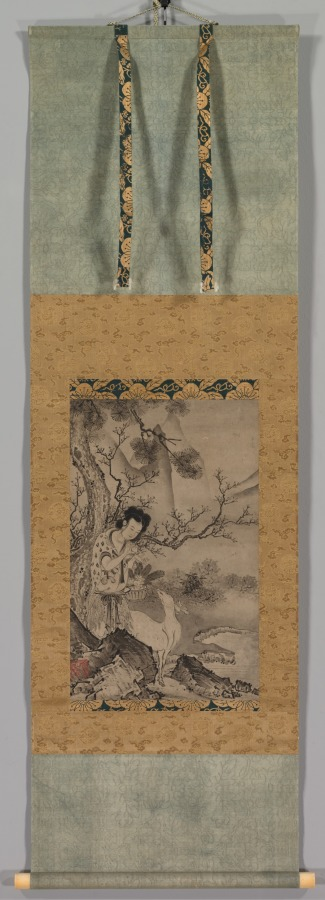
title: Female Daoist Figure in Landscape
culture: Japan, Muromachi period (1392–1573)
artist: Kōboku (Japanese)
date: early 1500s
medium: hanging scroll; ink on paper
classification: Painting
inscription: 「興牧」（朱文方印）